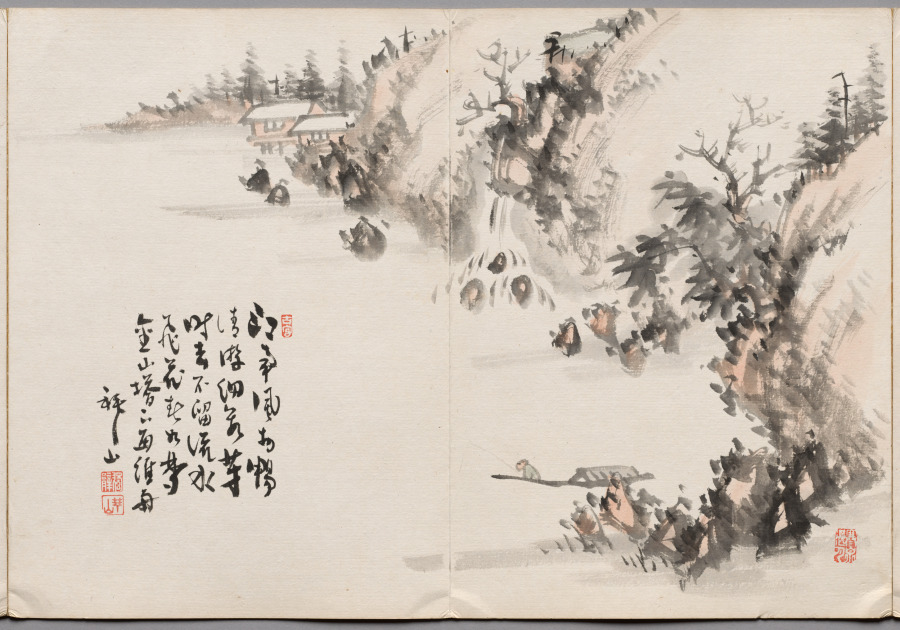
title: Painting Two from Album of Paintings by Haizan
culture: Japan, Meiji period (1868–1912) or Taishō period (1912–26)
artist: Yoshitsugu Haizan (Japanese, 1846–1915)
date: late 1800s-early 1900s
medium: page spread from double-sided accordion album; ink and color on paper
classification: Painting